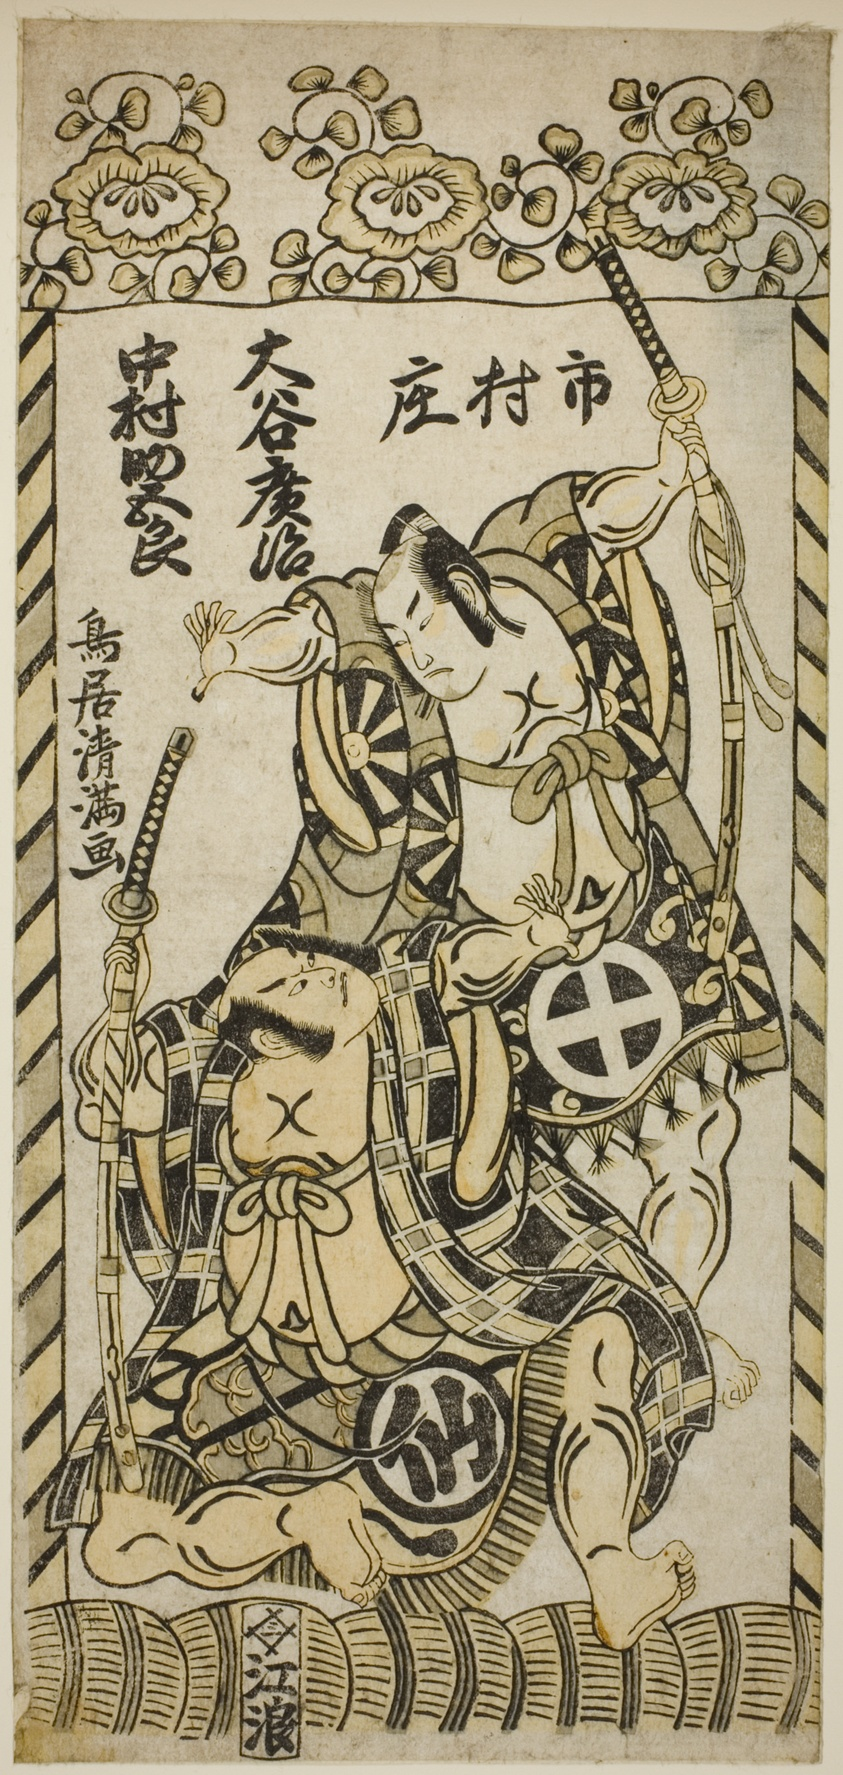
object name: Print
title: The Actors Otani Hiroji II as Kawazu Saburo and Nakamura Sukegoro I as Matano Goro in the play "Kashiwa ga Toge Kichirei no Sumo," performed at the Ichimura Theater in the eleventh month, 1755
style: Japanese (culture or style)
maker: Torii Kiyomitsu I (Japanese, 1735–1785)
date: 1755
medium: Color woodblock print; hosoban, benizuri-e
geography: Japan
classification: woodblock print; print; asian art